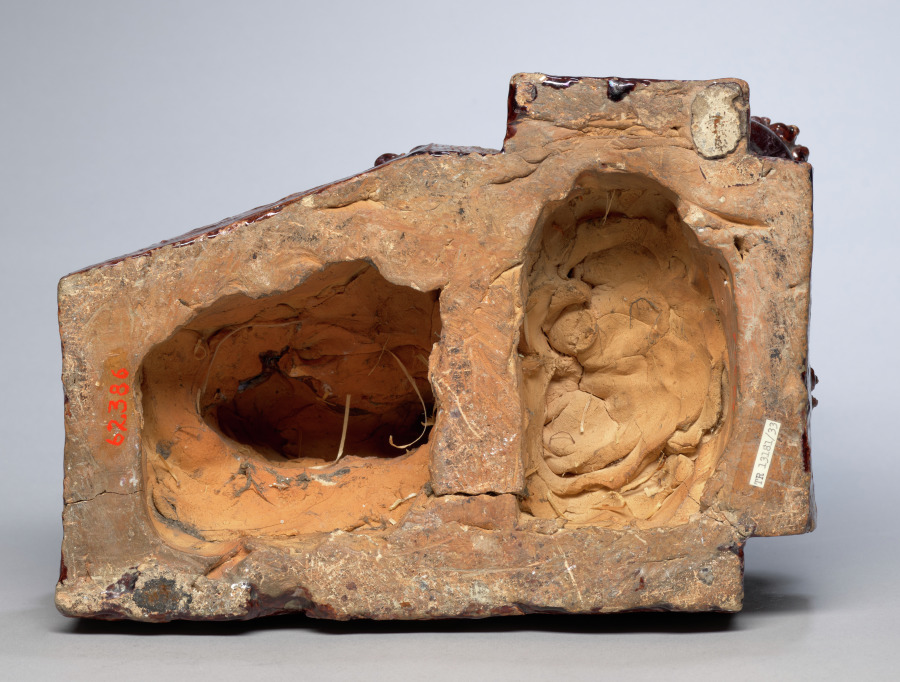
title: Lion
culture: France, 20th century (?)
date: 1900s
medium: terracotta glazed in mottled purple tin glaze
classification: Ceramic